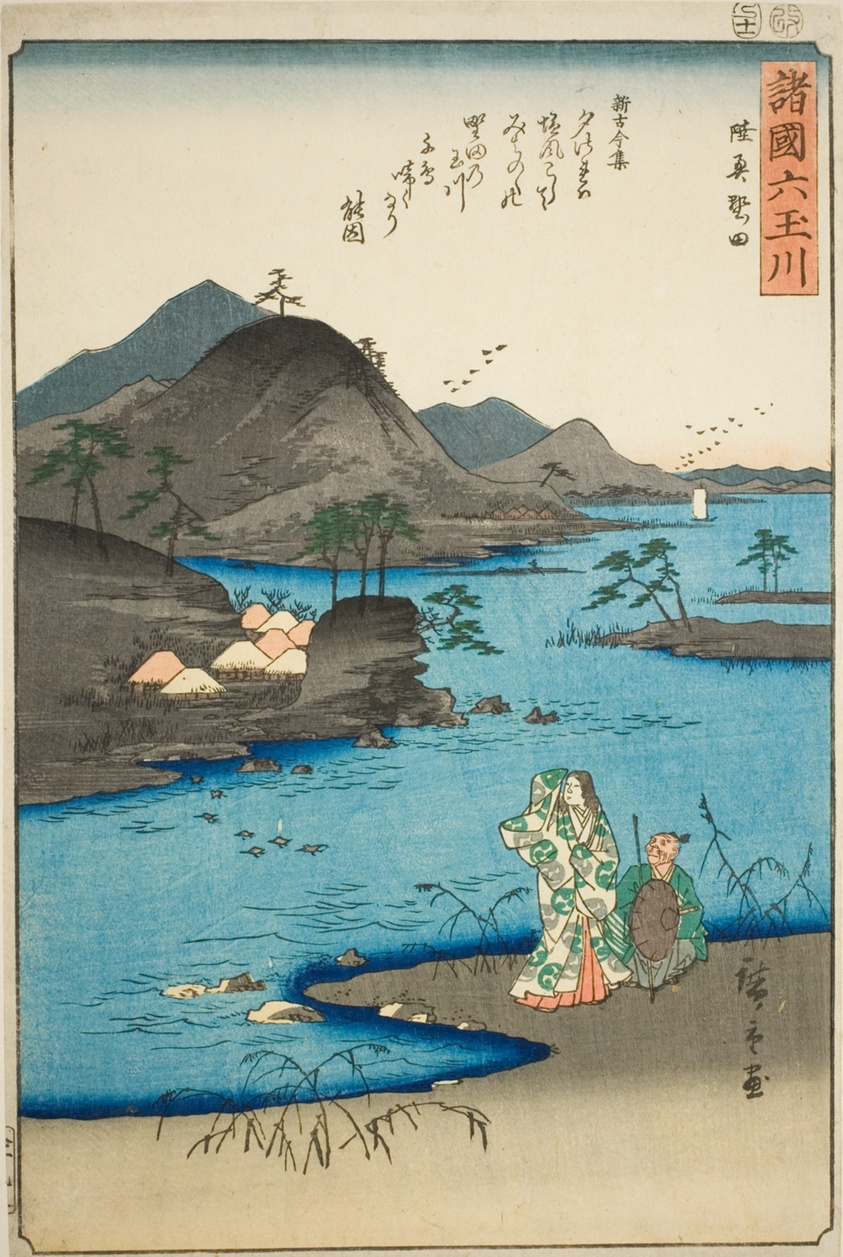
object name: Print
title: The Noda Jewel River in Mutsu Province (Mutsu Noda), from the series "Six Jewel Rivers in the Various Provinces (Shokoku Mu Tamagawa)"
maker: Utagawa Hiroshige 歌川 広重; Japanese, 1797-1858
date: 1857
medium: Color woodblock print; oban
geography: Japan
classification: woodblock print; print; asian art